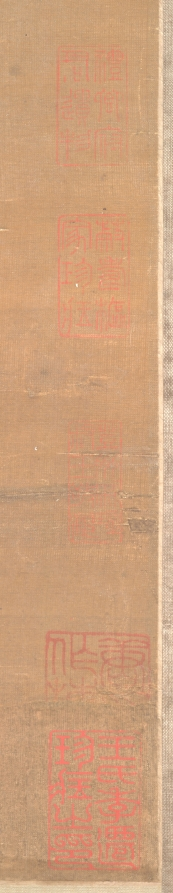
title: Xu Jingyang Moving His Family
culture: China, Ming dynasty (1368–1644)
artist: Cui Zizhong (Chinese, 1574–1644)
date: 1644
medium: Hanging scroll; ink and color on silk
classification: Painting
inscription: Artist's 2 seals: Pei-hai, Cui Zizhong yin.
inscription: 9 additional seals: 2 of Xiang Yuan (18th-19th c.); 1 of Tang Zuomei (late 18th-19th c.); 1 of Zhang Heng 張珩 (1915-1963); 1 of C. C. Wang 王季遷 (1907–2003); 4 unidentified.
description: Xu Jingyang was a dedicated fourth-century Confucian official who allegedly turned into a Daoist immortal. This scroll depicts the legend that when he attained immortality, he took his entire household, including chickens and dogs, to paradise. Cui Zizhong’s painting style intentionally referenced ancient masters. Typical of the pre-Song dynasty landscape tradition, there is the use of blue and green colors and an emphasis on outline rather than texture. While the trembling outlines are reminiscent of earlier painters, the flickering light on rocks and trees is a stylistic feature of Cui’s own time.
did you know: Xu Jingyang, wearing red, is in the upper register of figures, while below his servants transport a rooster, dog, and other supplies.